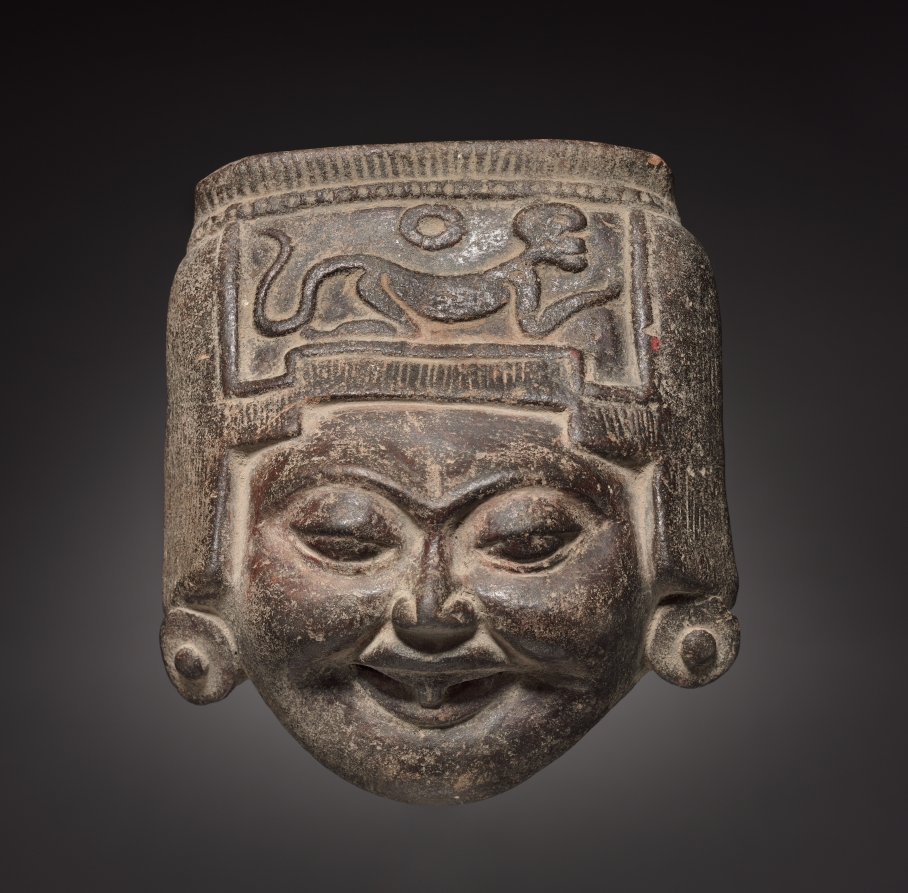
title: Head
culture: Mexico, Classic Veracruz (Remojados Culture)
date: 600–1100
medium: terracotta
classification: Sculpture